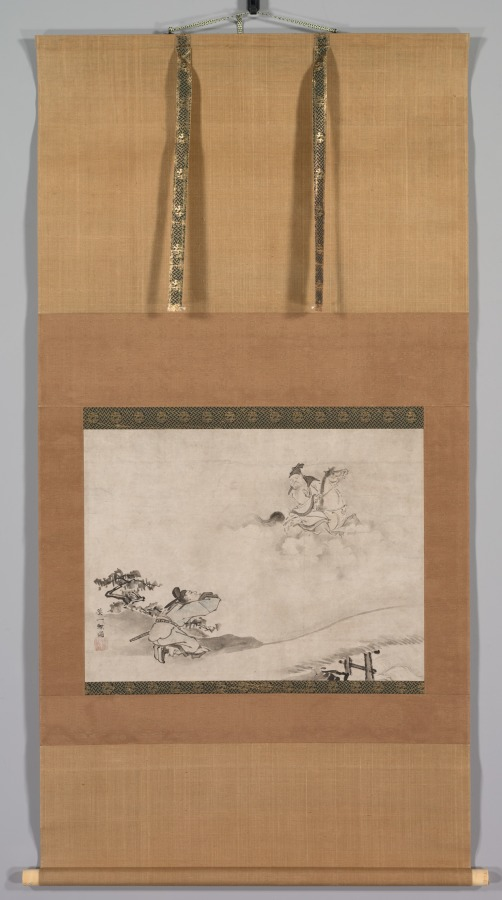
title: Daoist Immortal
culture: Japan, Edo period (1615–1868)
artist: Hanabusa Itchō (Japanese, 1652–1724)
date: 1615–1868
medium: hanging scroll, ink and color on paper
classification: Painting